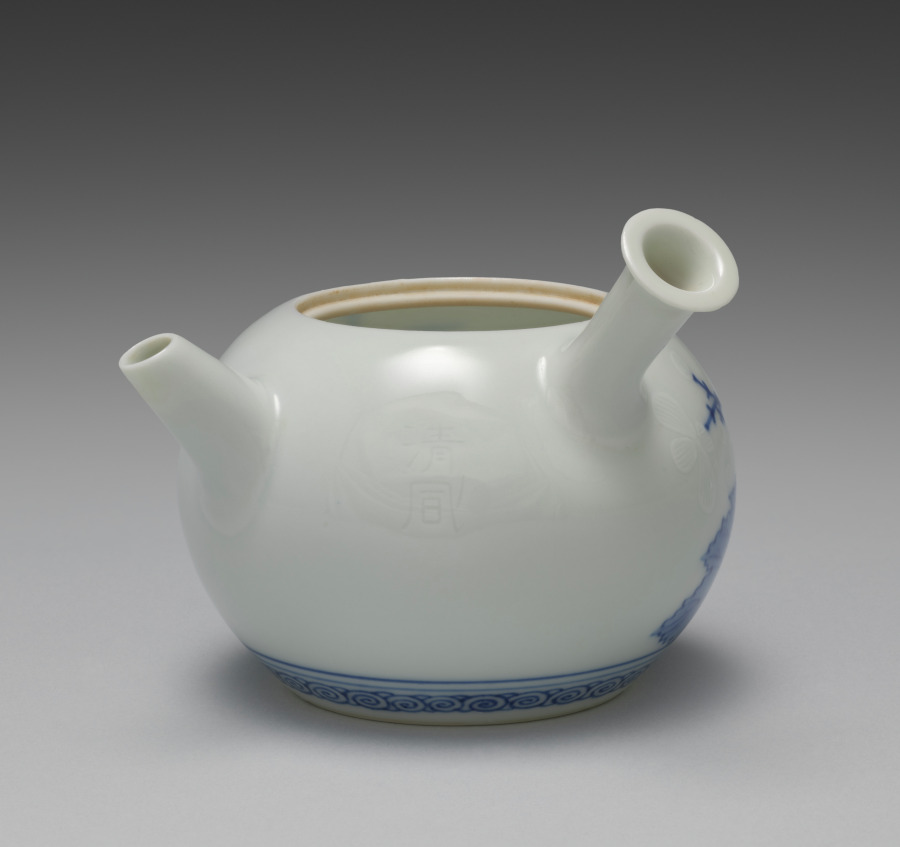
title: Teapot with Begonias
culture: Japan, Meiji period (1868–1912)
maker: Seifū Yohei III (Japanese, 1851–1914)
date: 1897–1914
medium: Porcelain with underglaze and overglaze colors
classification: Ceramic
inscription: 清風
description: This teapot has complex surface treatment: a design of begonias in modulated underglaze blue for the leaves and stems as well as thick overglaze white with incised lines to define the petals, plus small areas of underglaze yellow at their low-relief centers. A band of underglaze blue gives further definition to the lid’s handle, and the area just above the base has a double band of blue above a row of snail-shell curls. Unlike many other teapots, which have marks on their bases, this one has “Seifu” incised into one of its sides in relatively large characters. It is the side that would face the host if the teapot were held by the handle with the right hand, which would be the expectation.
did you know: This teapot with begonias combines underglaze blue with subtle use of yellow and white enamels.